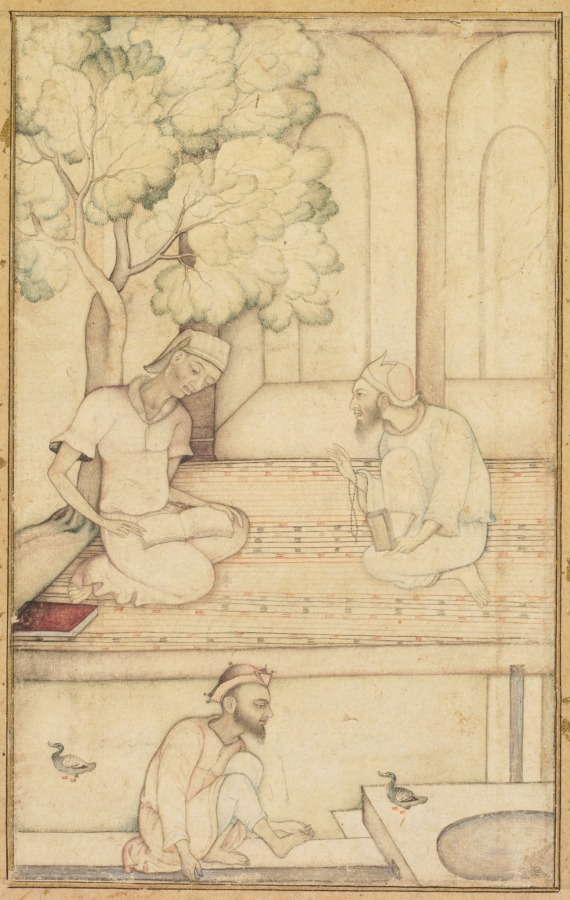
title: Kabir and Two Followers on a Terrace (recto); Calligraphy (verso)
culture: India, Mughal, 17th century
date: c. 1610–1620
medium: Gum tempera, ink, and gold on paper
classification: Painting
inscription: Verso: Persian ruba‘i (quatrain) by Maulana Muḥammad Murshidi Zawara’i (Persian, late 1500s–early 1600s); Calligraphy in nasta‘liq script: A Christian with his zonnar string and your amber locks, A pious ascetic in a prayer niche and the angle of your eyebrows, O Lord! What kind of a qibla are you That night and day the hearts of both Muslims and Infidels are turned toward you?